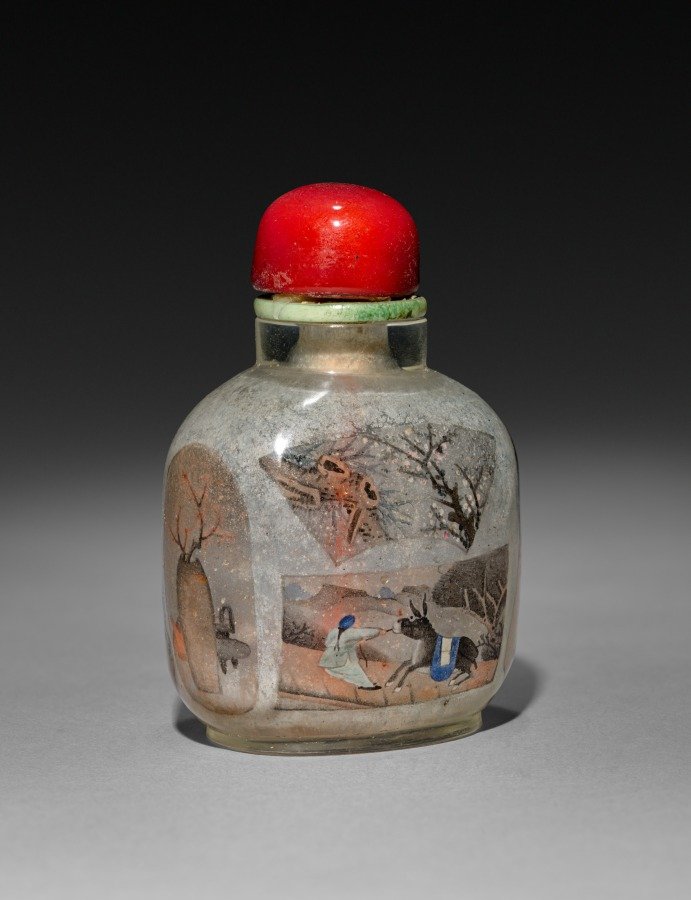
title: Snuff Bottle with Stopper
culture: China, Qing dynasty (1644–1911), Qianlong reign (1736–95)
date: 1736–95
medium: crystal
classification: Stone